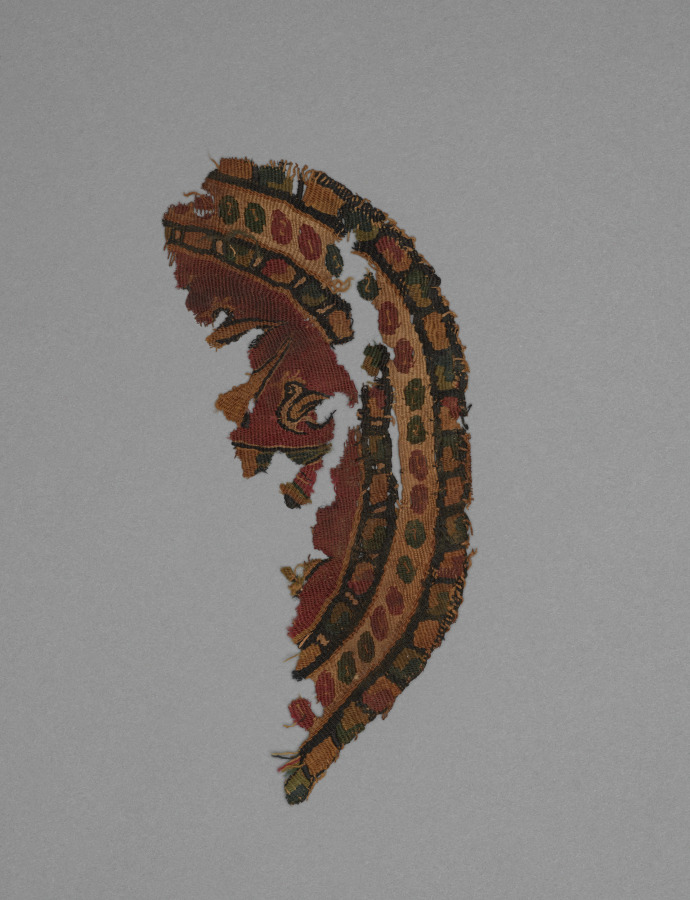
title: Lions from a Tunic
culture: Egypt, Islamic Abbasid period, 8th - 9th Century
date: c. 800's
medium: tapestry weave with supplementary weft wrapping; undyed linen and dyed wool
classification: Textile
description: The royal lions and jeweled border in this colorful roundel, originally from a tunic, conveyed power and wealth. The symmetrical design with lions and ducks flanking the central palmette (fan-shaped plant form) indicates that the pattern was copied from a costlier silk textile woven on a loom that automatically repeated the design in mirror-image symmetry.